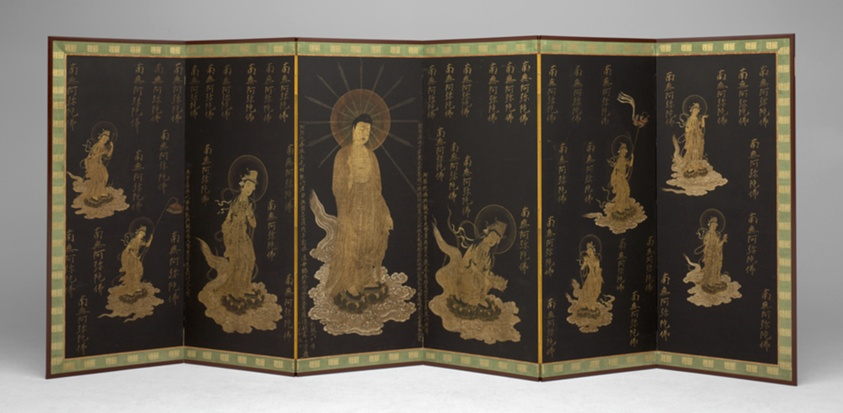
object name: Painting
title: Rebirth of the Nun Anyo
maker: Artist unknown; Japanese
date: Early 18th century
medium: Six-panel screen (one of a pair); Ink, colors, and gold on paper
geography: Japan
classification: screen; painting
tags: Buddhism, religion